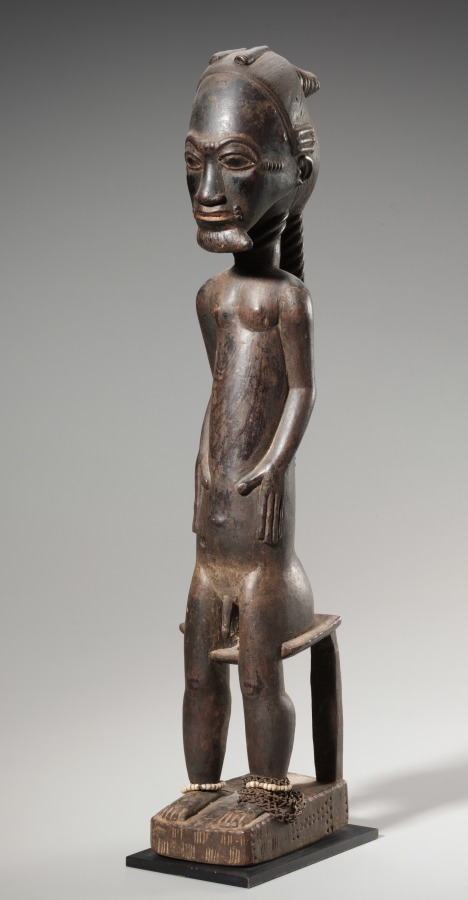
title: Male Figure from a Pair (asye usu)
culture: Africa, West Africa, Côte d’Ivoire, Baule-style carver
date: late 1800s–early 1900s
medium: Wood, resin, glass beads, plant fiber, and metal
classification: Sculpture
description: Baule figures carved as pairs usually represent untamed spirits of the wilderness called asye usu. These spirits may intervene in the lives of individuals by taking possession of them. If this possession does not result in madness, it can lead to the human host’s becoming a diviner who can enter into a trance to reveal the causes of ailments and other misfortunes. People who feel their lives are being interrupted by the asye usu commission carvings representing idealized male and female forms whose grace and beauty in both anatomy and adornment will seduce the spirits and compel them to use the sculptures as their temporary homes.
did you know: Baule artists looked to the world around them to capture contemporary ideas and ideals of beauty; this figure's hairstyle would have been worn when the sculpture was carved.